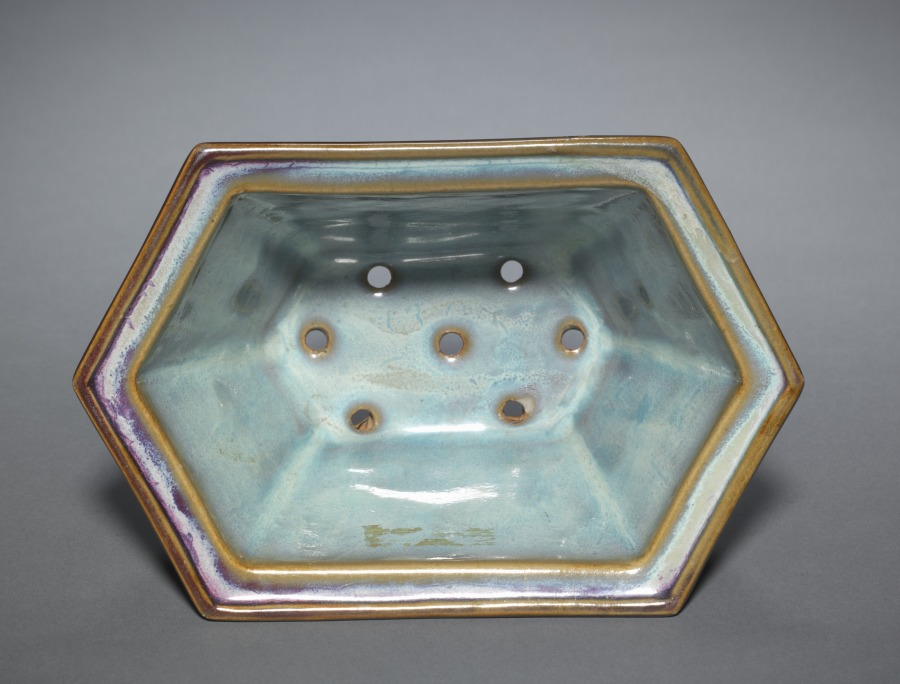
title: Hexagonal Flower Pot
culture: China, Henan province, Yuxian, Juntai, Ming dynasty (1368-1644)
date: early 1400s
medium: porcelaneous stoneware, numbered Jun ware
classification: Ceramic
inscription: 十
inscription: 明窓用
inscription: 養心殿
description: This deep hexagonal flowerpot, one of a pair in the collection, is numbered "10" and bears additional inscriptions to specifically indicate the location of its usage within the palace: "for use in the Study of Illumination (Mingchuang yong)" within the "Hall of Cultivating the Mind (Yangxin Dian)" of the Forbidden City. The inscriptions seem to suggest the Qing imperial provenance of this flower pot.